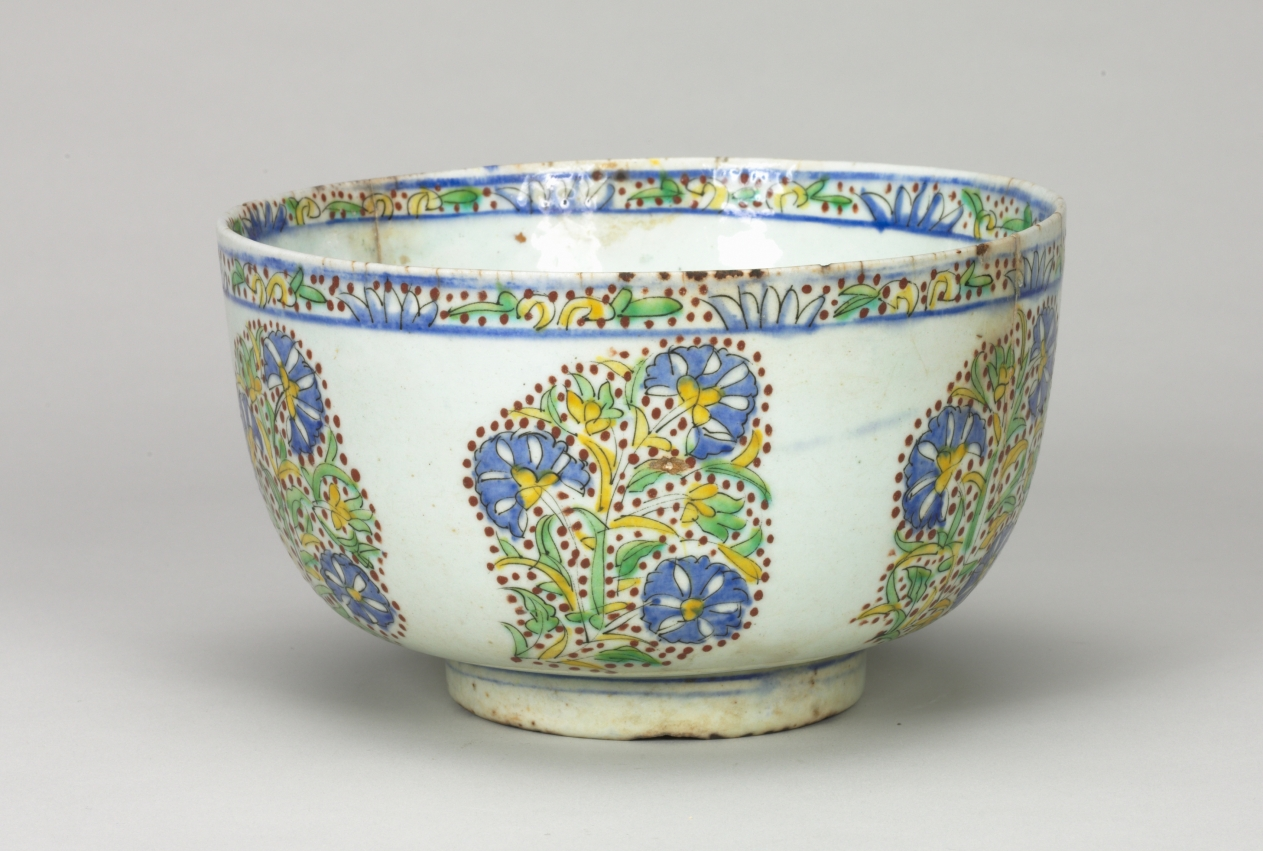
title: Deep Bowl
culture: Turkey (Kutahya), Ottoman Period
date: 1700s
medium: fritware with underglaze-painted design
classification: Ceramic